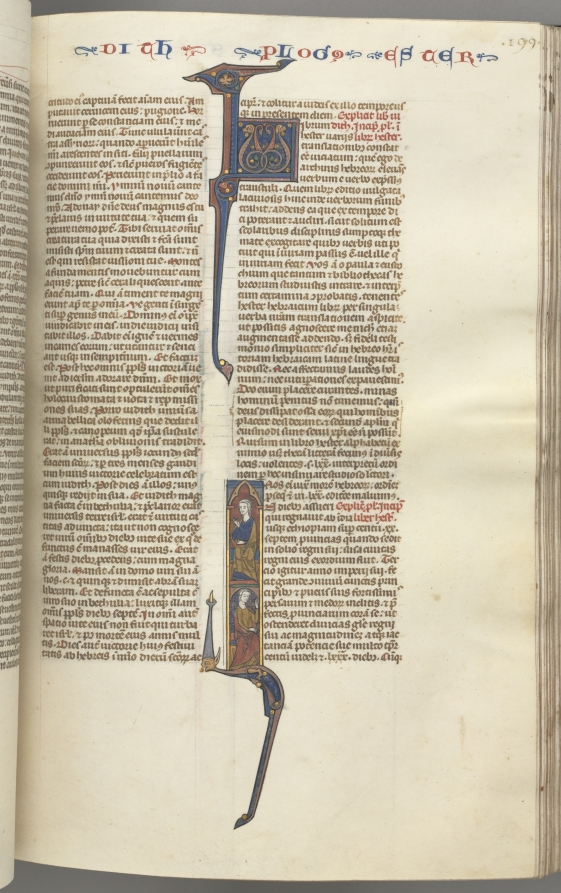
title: Fol. 199r, Esther, historiated initial, two seated male figures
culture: Southern France, Toulouse(?), 13th century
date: c. 1275–1300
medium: ink, tempera and gold on vellum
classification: Bound Volume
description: Biblical manuscripts were highly prized and important possessions of churches, monasteries, cathedral schools, and universities throughout medieval Europe. The biblical texts were known as the vulgate, the translations made by Saint Jerome in the fourth century from Hebrew and Greek into Latin, which became the definitive and official Latin version of the Roman Church. In the 13th century, the bible was, for the first time, produced as a single volume with an officially sanctioned sequence to its books and chapters as illustrated by this example. The very extensive decoration of this bible is arranged hierarchically to indicate the relative importance of the various texts so that full or almost full-page initials mark the openings of the first prologue, Genesis, and the first Gospel; historiated initials mark the beginning of each book and illuminated initials mark the Prologues.